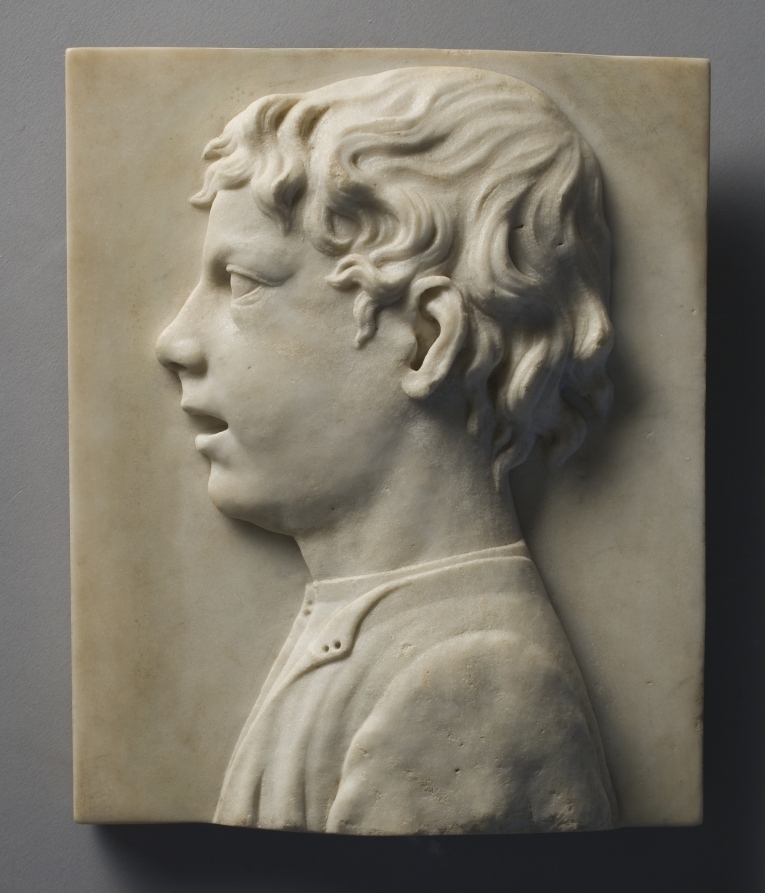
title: Head of a Boy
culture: Italy, Florence, 15th century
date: c. 1460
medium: marble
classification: Sculpture